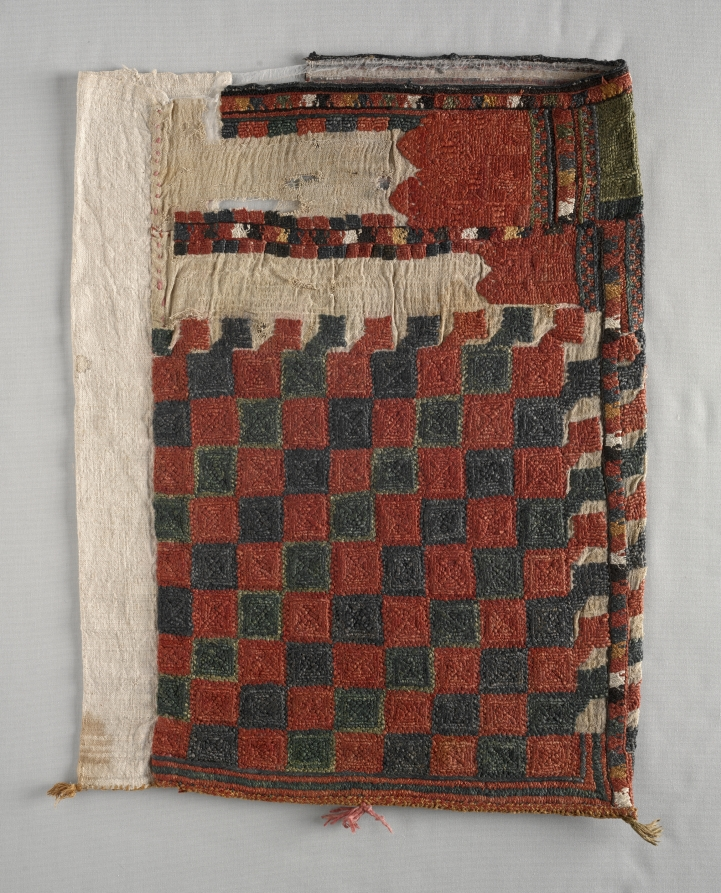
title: Skirt Border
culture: Greece, Dodecanese Islands, Karpathos Island, 17th-18th century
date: 1600s - 1700s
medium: embroidery: silk on linen tabby ground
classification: Embroidery